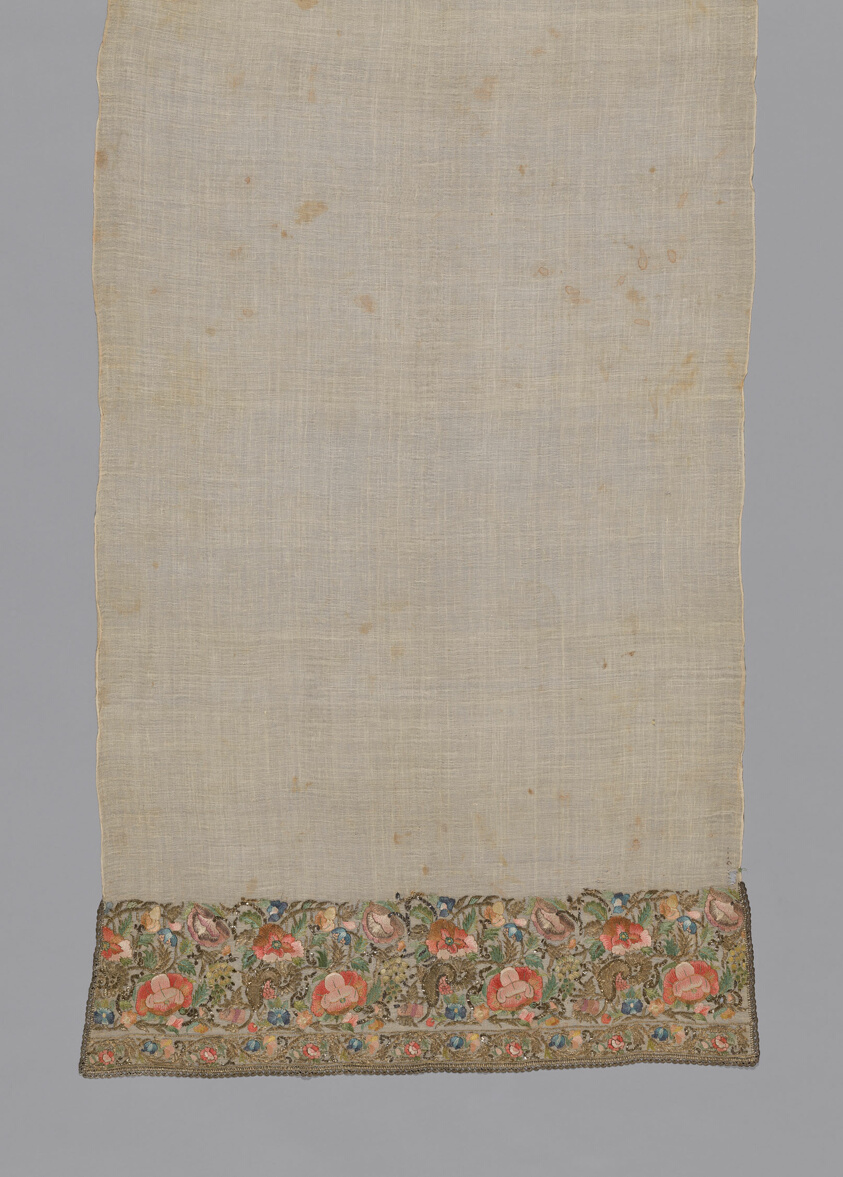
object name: Textile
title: Towel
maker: Turkey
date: 1850/1900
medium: Embroidered with floral border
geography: Turkey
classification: textile; needlework (visual works); weaving